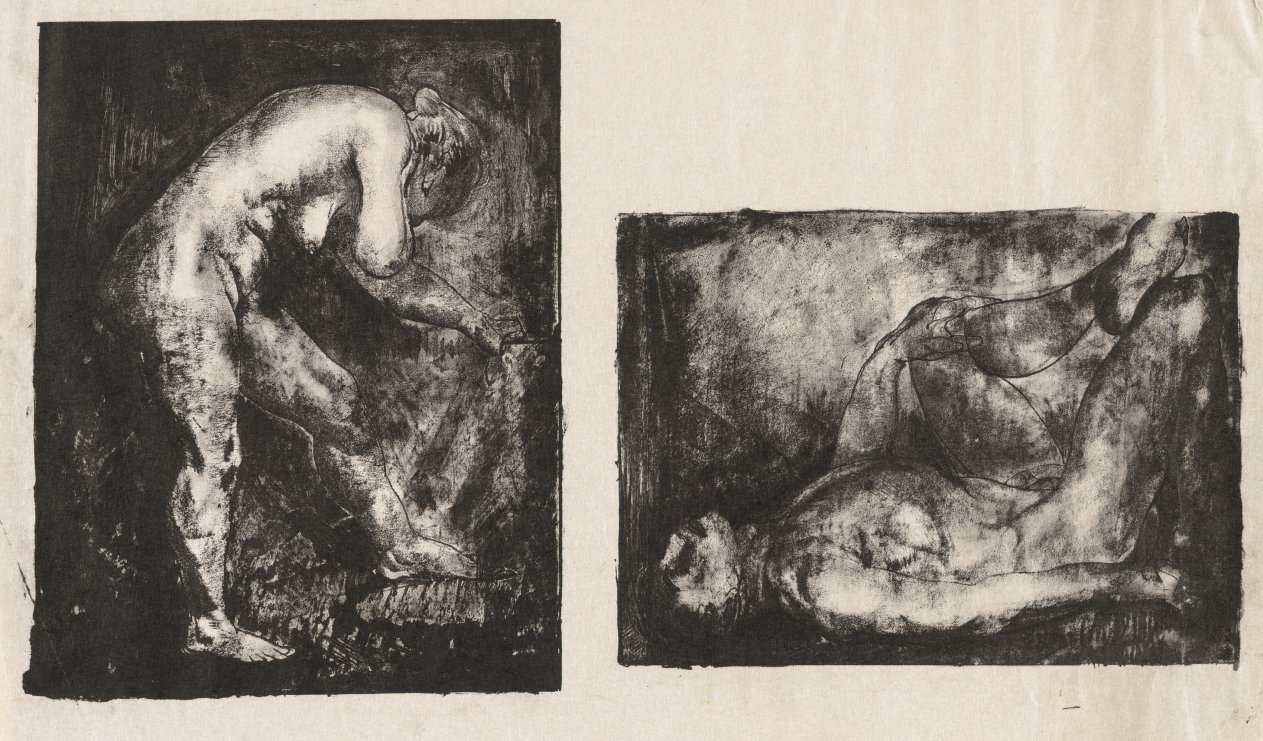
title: Man on his Back, Nude, Second State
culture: America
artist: George Bellows (American, 1882–1925)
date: 1916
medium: lithograph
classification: Print